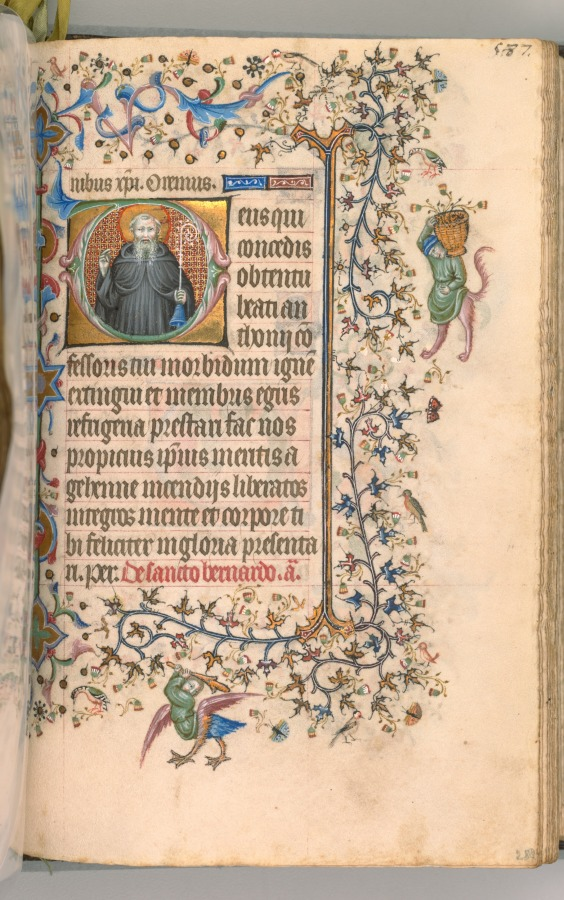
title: Hours of Charles the Noble, King of Navarre (1361-1425): fol. 288r, St. Anthony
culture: France, Paris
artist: Master of the Brussels Initials and Associates (French)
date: c. 1405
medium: ink, tempera, and gold on vellum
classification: Bound Volume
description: This precious volume was obviously highly prized by its owner, the French-born King of Navarre, who had his coat of arms painted on no less than twenty folios. Rather than directly commissioning this manuscript from a specific workshop, it seems that Charles the Noble acquired his book of hours -- perhaps ready-made for the luxury market -- while on a trip to Paris in 1404-05. A collaborative effort, six painting styles are evidenced within the pages of this codex, those of two Italians, two Frenchmen, and two Netherlanders. The painter who was responsible for the planning and decoration of the book, and who produced seventeen of the large miniatures, was a Bolognese artist known as the Master of the Brussels Initials. His principal assistant, responsible for most of the borders, was a Florentine who signed his name "Zecho" da Firenze on folio 208 verso.